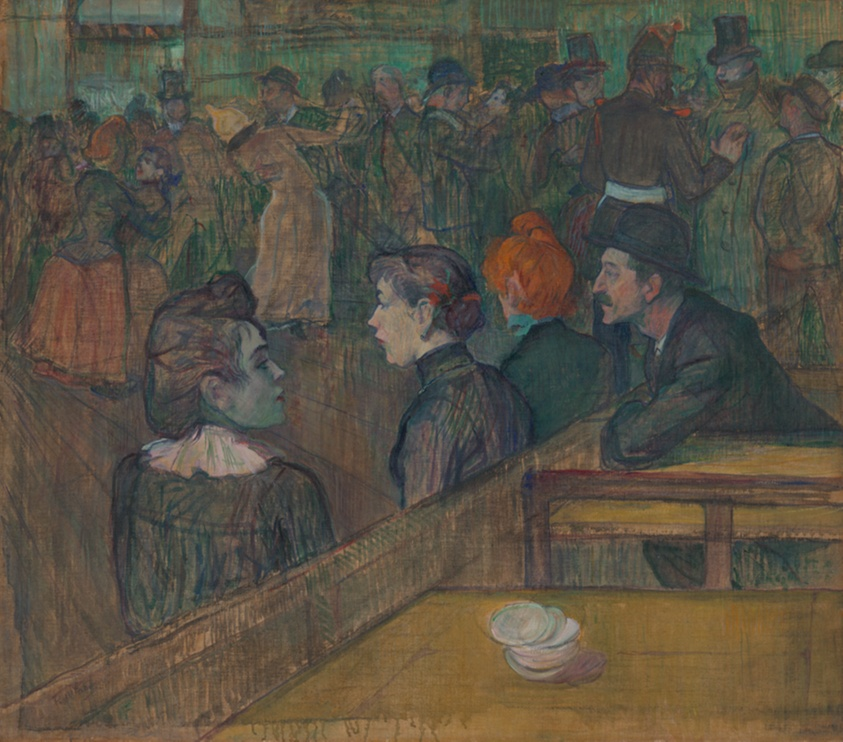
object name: Painting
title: Moulin de la Galette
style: Post-Impressionism, nineteenth century, 19th century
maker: Henri de Toulouse-Lautrec (French, 1864–1901)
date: 1889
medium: Oil on canvas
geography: France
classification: oil on canvas; paint; oil paintings (visual works); french; painting; european painting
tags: nightlife, table, night, dance, women, night scenes, leisure, dancers, men, urban life, Century of Progress, world's fairs, Chicago World's Fairs